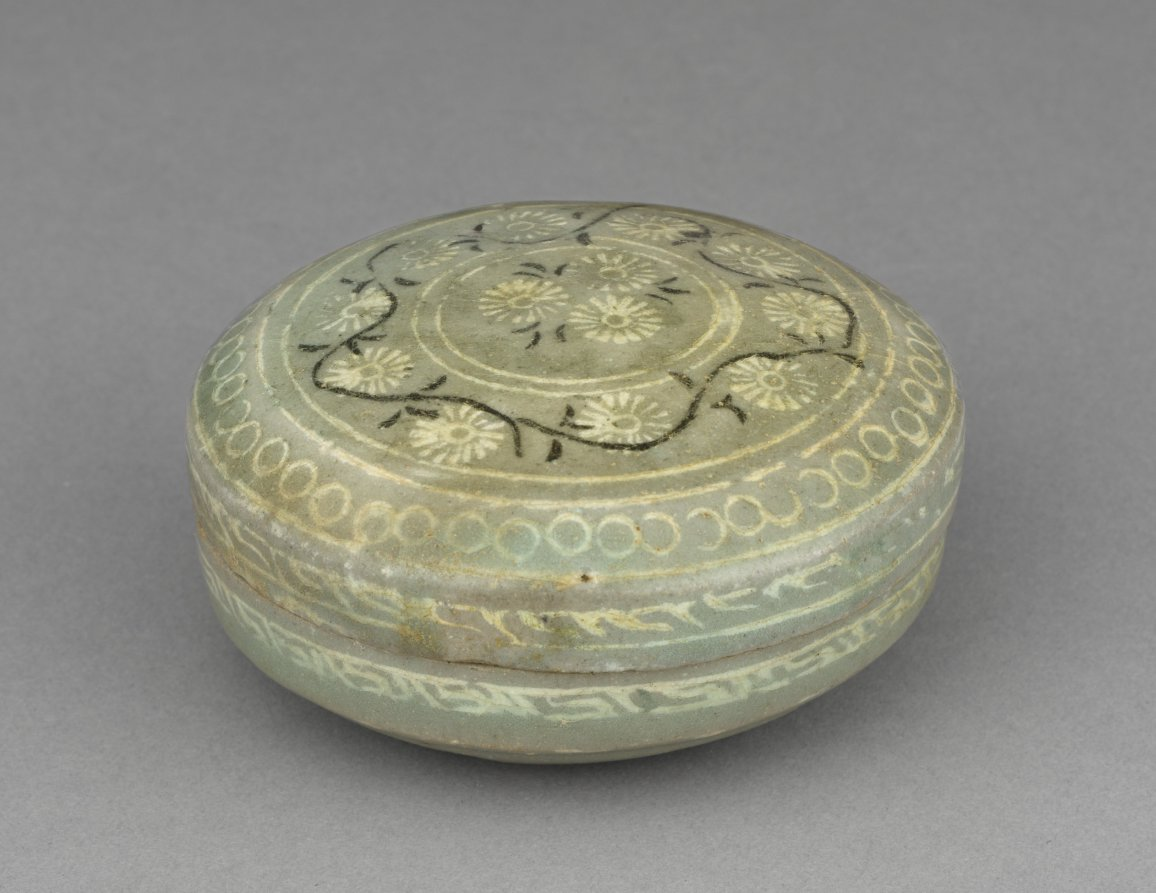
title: Box and Cover with Inlaid Chrysanthemum and Scroll Design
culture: Korea, Goryeo dynasty (918–1392)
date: 1200s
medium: inlaid celadon ware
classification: Ceramic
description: Celadons, spoons, seals, and bronze mirrors were the most common burial objects in tombs during the Goryeo period (918–1392). Once used to contain colored powder, rouge, and eyebrow gel for makeup, this small container was one of the standard goods that furnished elites' tombs. Both women and men used the grain powder of rice or millet for whitening their skin, safflower extract for rouge, and plant ash or soot for eyebrow gel. Yet, natural-looking makeup seems to have been the most favorable one in Korea according to the travelogue by Xu Jing (1091–1153), the Chinese diplomat who visited Korea in 1123.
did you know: This ceramic container was used to store either incense or cosmetics.